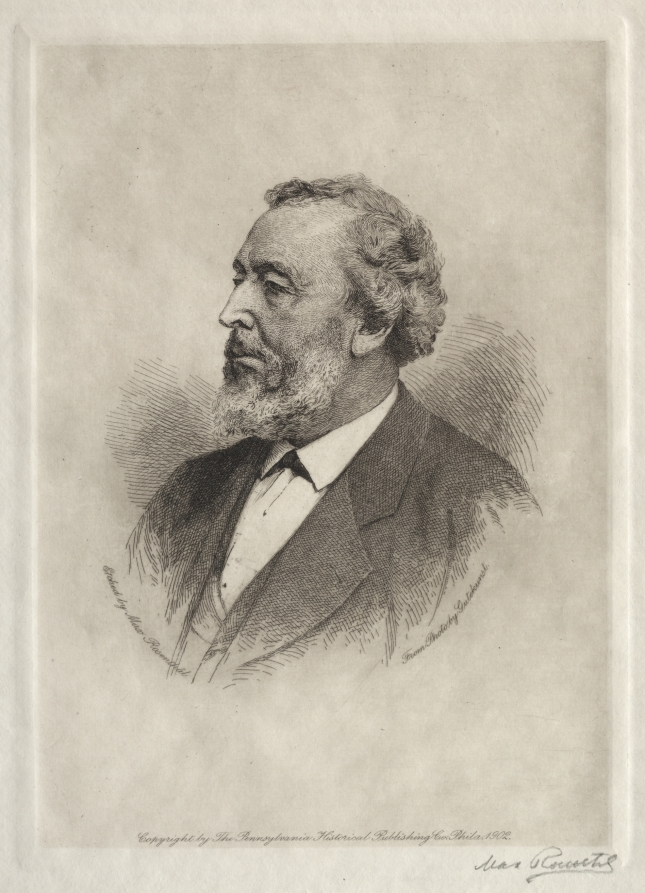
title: Bayard Taylor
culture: America, early 20th Century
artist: Max Rosenthal (American, 1833–1918)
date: 1902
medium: mezzotint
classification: Print